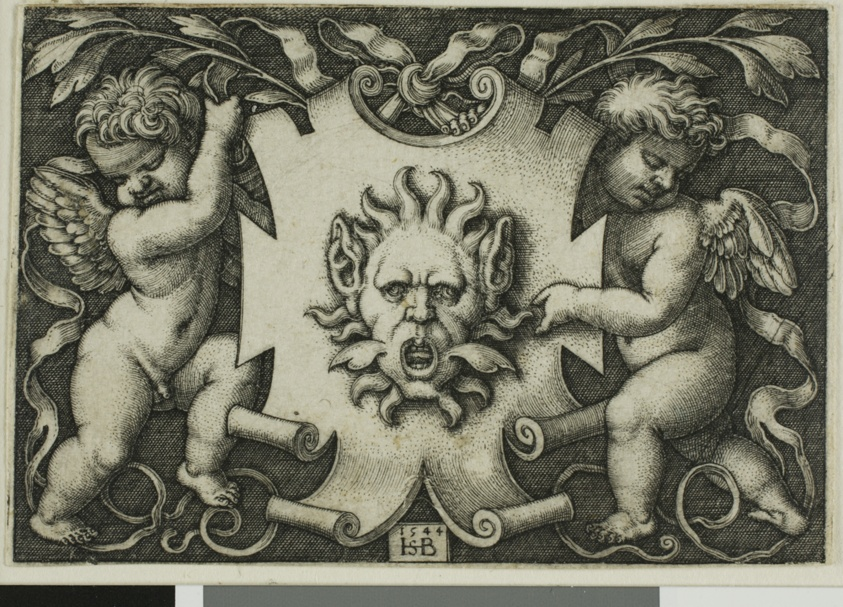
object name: Print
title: Ornament with a Mask Held by Two Genii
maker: Sebald Beham; German, 1500-1550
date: 1544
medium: Engraving in black on ivory laid paper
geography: Germany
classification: engraving; print; prints and drawing